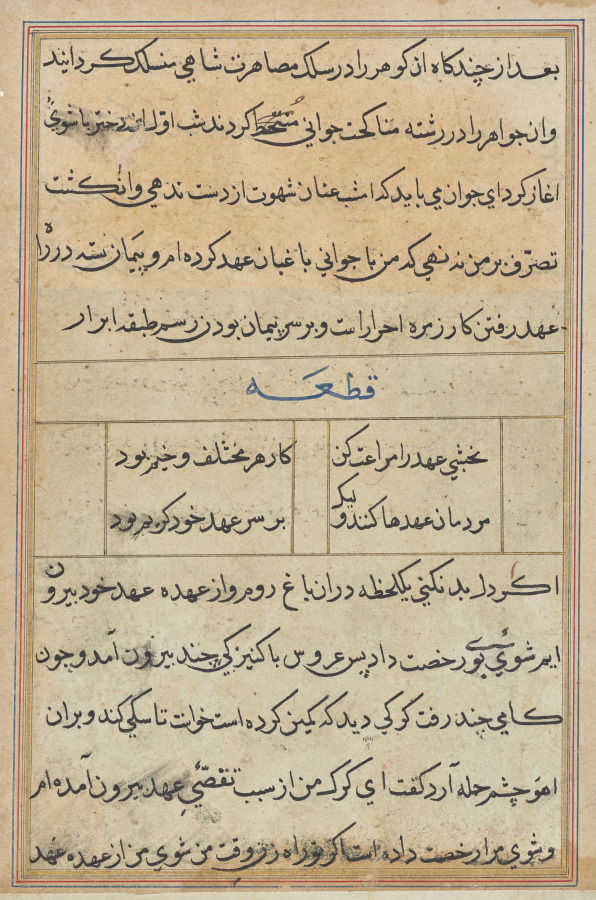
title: Page from Tales of a Parrot (Tuti-nama): text page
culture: Mughal India, court of Akbar (reigned 1556–1605)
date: c. 1560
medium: gum tempera, ink, and gold on paper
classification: Painting